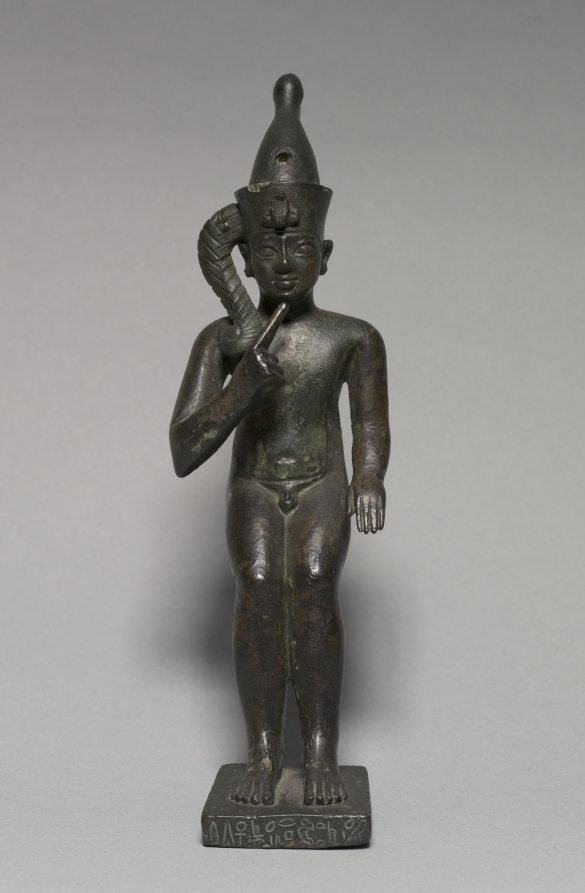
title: Statuette of Harpocrates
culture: Egypt, Greco-Roman period (332 BCE–395 CE), Ptolemaic dynasty (305–30 BCE)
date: 304–30 BCE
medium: bronze, solid cast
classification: Sculpture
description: Horus the Child (Harpocrates) was always shown in the childish attitude of holding a finger to his mouth.